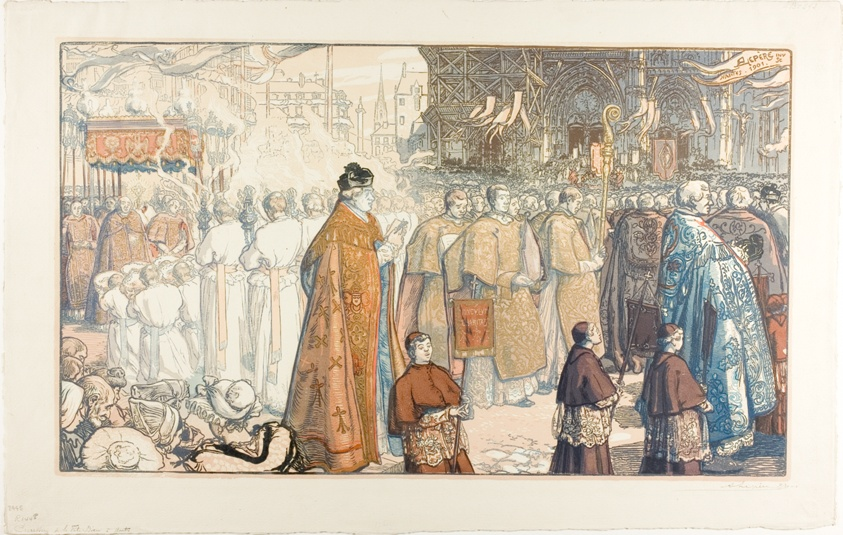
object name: Print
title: The Corpus Christi Procession, Nantes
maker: Louis Auguste Lepère (French, 1849-1918)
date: 1901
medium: Woodcut in dark blue, light blue, brown, orange, eggplant, peach, gold, pale salmon, tan, blue-gray, gray on cream laid paper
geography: France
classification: woodcut; print; prints and drawing